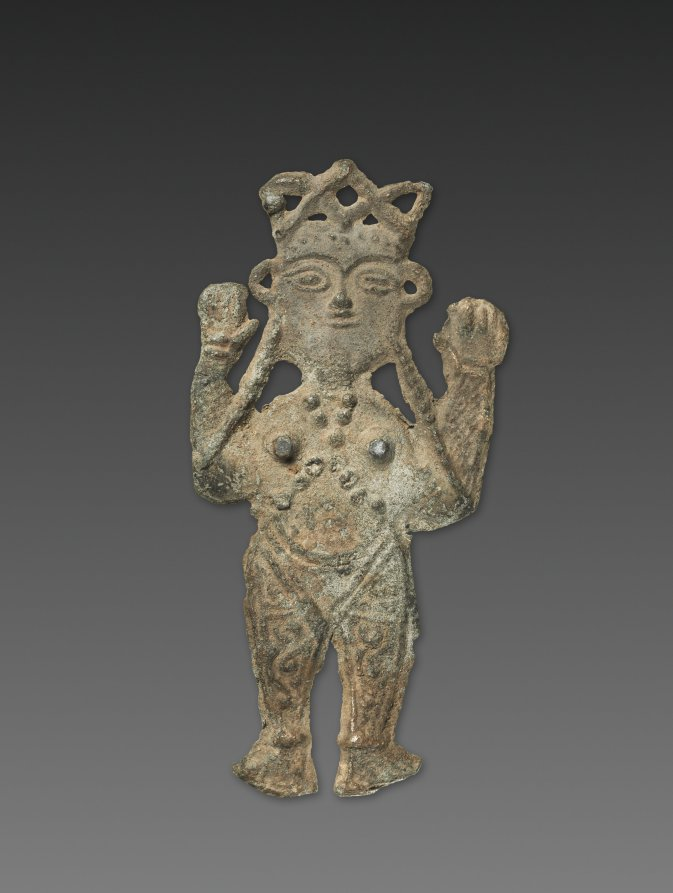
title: Orans Figure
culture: Iran, Medieval Period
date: before 1984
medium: lead relief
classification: Sculpture